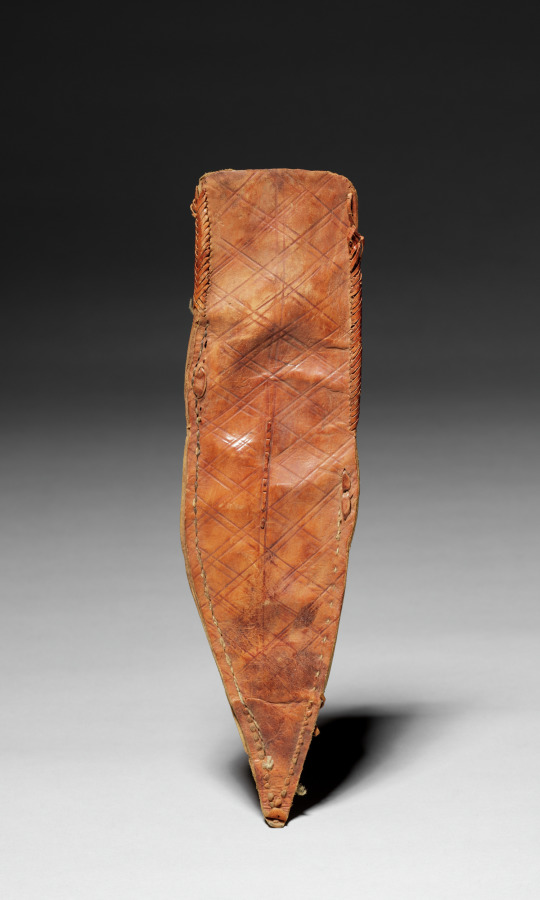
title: Scabbard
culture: Africa, East Africa, Somalia, unknown maker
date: early 1900s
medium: Rawhide or leather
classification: Arms and Armor